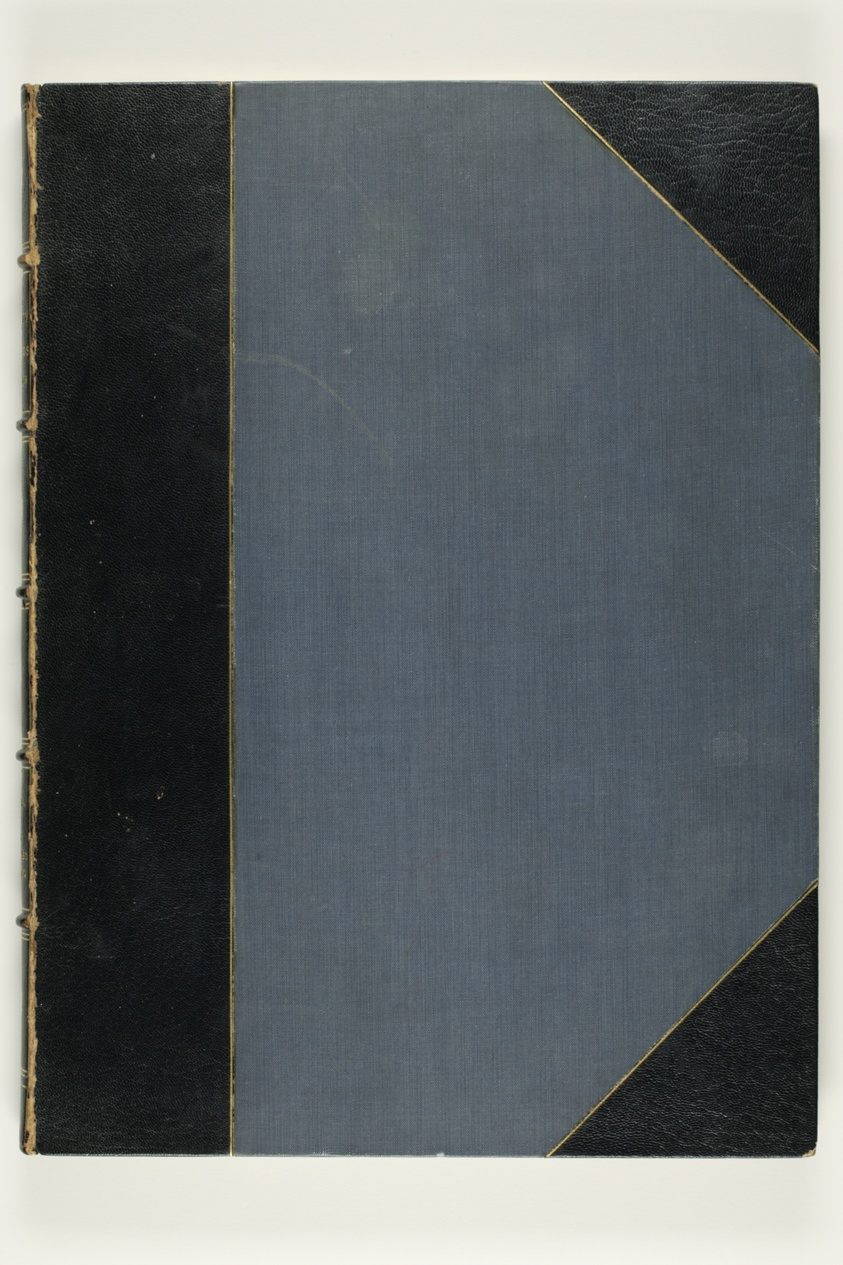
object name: Book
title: The 26 Etchings (Second Venice set)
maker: James McNeill Whistler (American, 1834-1903)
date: 1924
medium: Bound volume of etchings and drypoints printed from original cancelled copper plates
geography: United States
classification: etching; book; prints and drawing